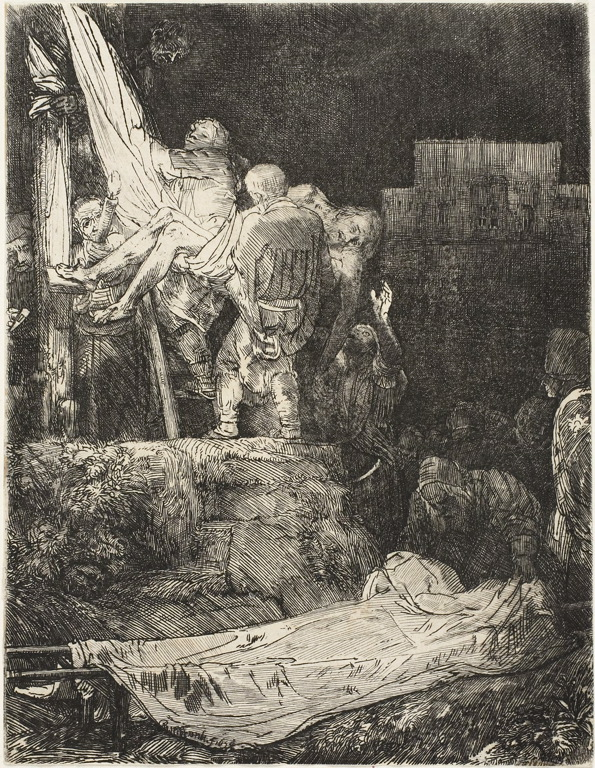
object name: Print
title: The Descent from the Cross by Torchlight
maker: Rembrandt van Rijn (Dutch, 1606-1669)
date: 1654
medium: Etching and drypoint on off-white laid paper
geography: Holland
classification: etching; print; prints and drawing; paper; drypoint